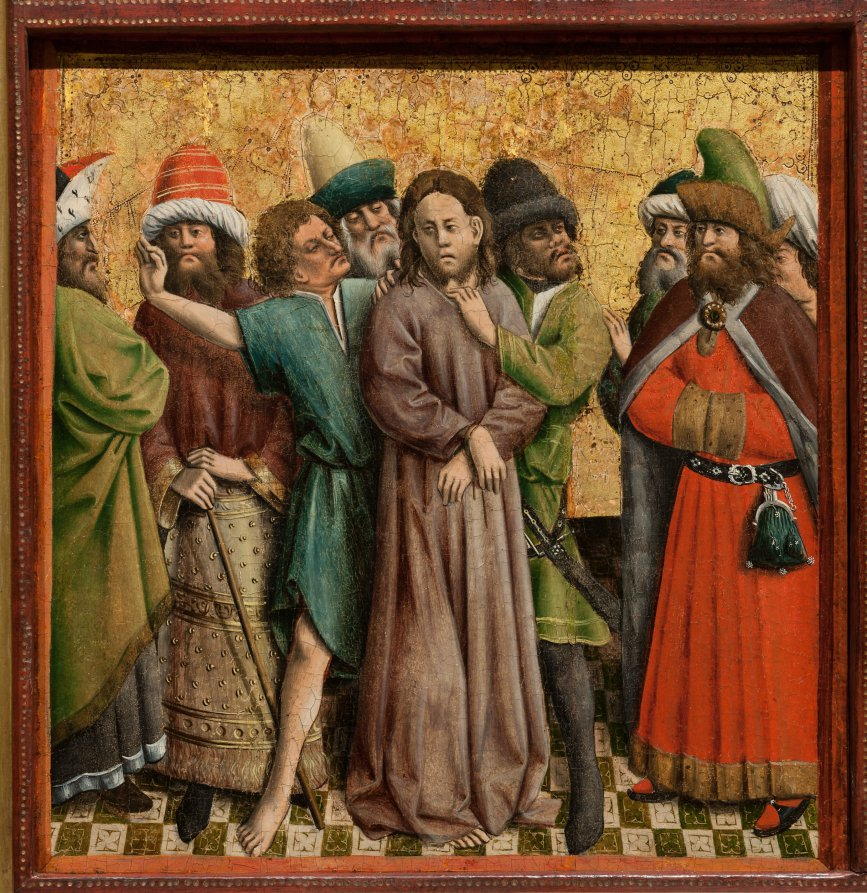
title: Altarpiece with The Passion of Christ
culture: Germany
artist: Master of the Schlägl Altarpiece (German)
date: c. 1440s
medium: oil and gold on wood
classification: Painting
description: The visual focus of this altarpiece is the suffering and death of Christ on the cross. So-called Passion cycles in art include the events leading up to and following the Crucifixion, not only as single subjects but as scenes meant to be read in sequence. Passion cycles were promoted by the two great teaching orders, the Franciscans and the Dominicans, for whom this subject represented the main religious drama of their churches, and also by the German mystics who advocated private contemplation on the humanity and suffering of Christ. The original context for this altarpiece remains unknown, but it was probably made for a religious institution in Westphalia in the Rhine Valley. During the 1870s it was given to the Abbey of Schlägl, near Linz in Upper Austria, from which both altarpiece and artist take their names. The altarpiece is not preserved today in its original format, and some of the individual scenes are missing. Scholars continue to debate the original number of scenes and their sequencing; nine of the original panels have survived.